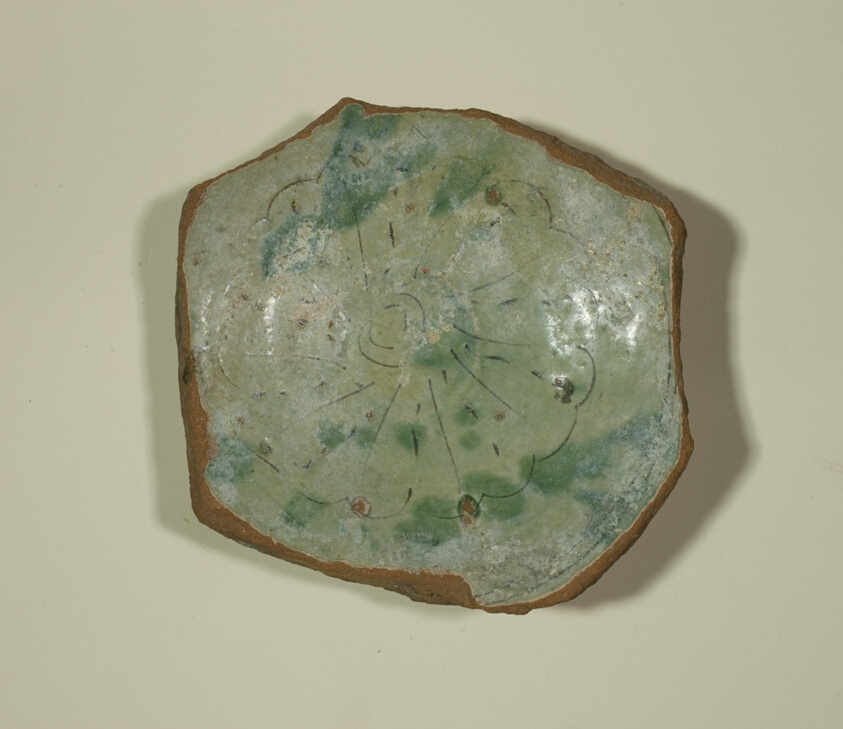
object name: Decorative Arts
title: Fragment of a Bowl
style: byzantine, european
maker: Post-Byzantine; Greece, Athens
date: 17th century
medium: Ceramic, sgraffito design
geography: Istanbul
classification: fragment; ceramics; vessel; bowl; asian art; decorative arts